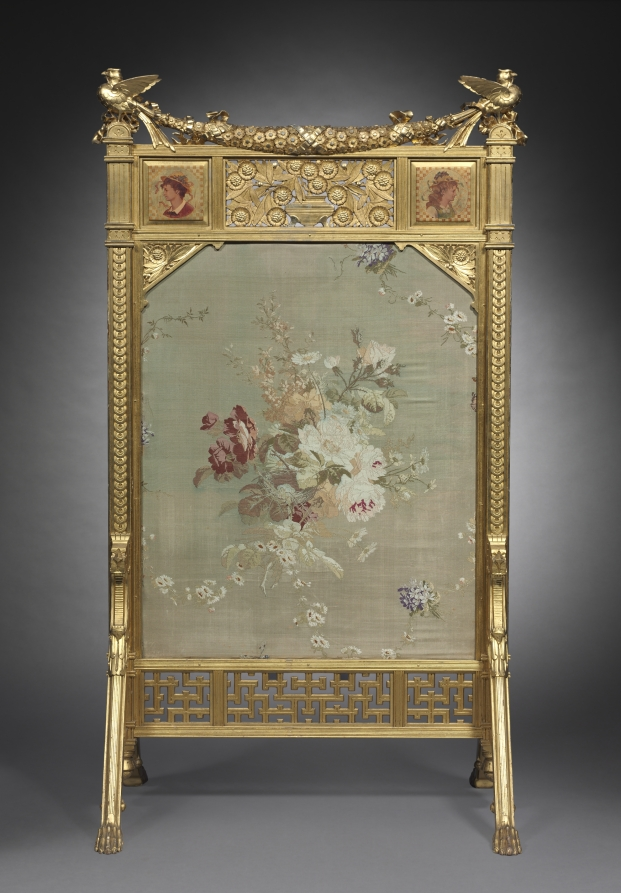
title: Fire Screen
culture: America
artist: firm of Herter Brothers (American)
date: c. 1878–80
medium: gilded wood, painted and gilded wood panels, brocaded silk, embossed paper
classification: Furniture and woodwork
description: During the 1870s the New York firm of Herter Brothers produced some of the most sophisticated and technically refined furniture made anywhere in the world at that date. Although the firm is known to have made a considerable quantity of gilded furniture, this fire screen is one of only a few examples to survive in good condition. The painted and gilded embossed panel of birds and flowers was likely made in Japan.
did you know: Produced by the New York decorating firm Herter Brothers, this screen would have been used to shield sitters from the heat of a fireplace.